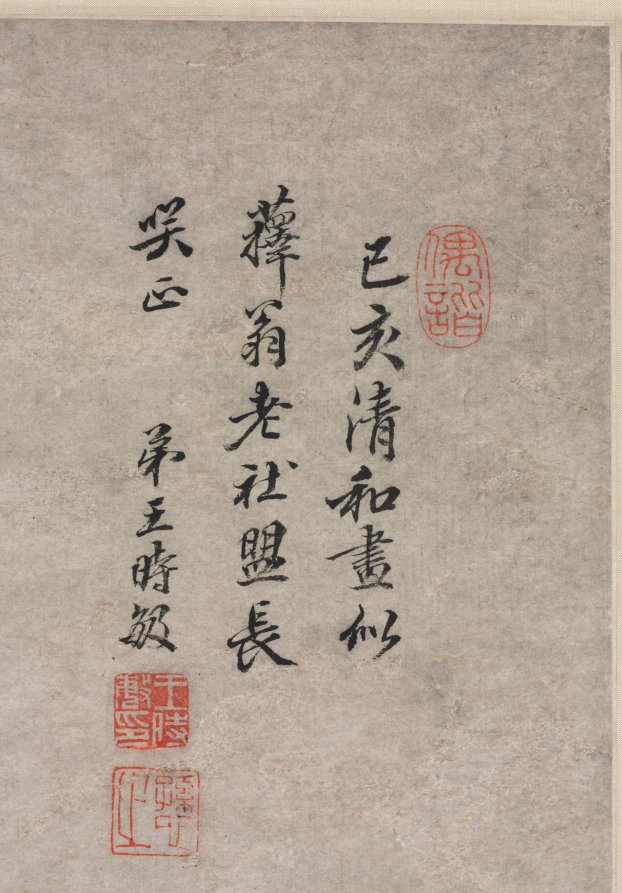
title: Mountain Village Embraced by the Summer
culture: China, Qing dynasty (1644-1911)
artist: Wang Shimin (Chinese, 1592–1680)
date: 1659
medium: hanging scroll, ink on paper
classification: Painting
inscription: Artist's inscription, signature, and 3 seals: [seal] Ouxie 偶諧. In the jihai year [1659], the fourth lunar month, I painted this for T'o-weng, my senior in our literary club, for your amusement and correction. Your junior Wang Shimin. [seals] Wang Shimin yin 王時敏印; Xunzhi 遜之.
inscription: 2 additional seals: 1 of Jiang Gusun [Chiang Ku-sun] 將穀孫 (20th century); 1 of C. C. Wang 王季遷 (1907–2003).